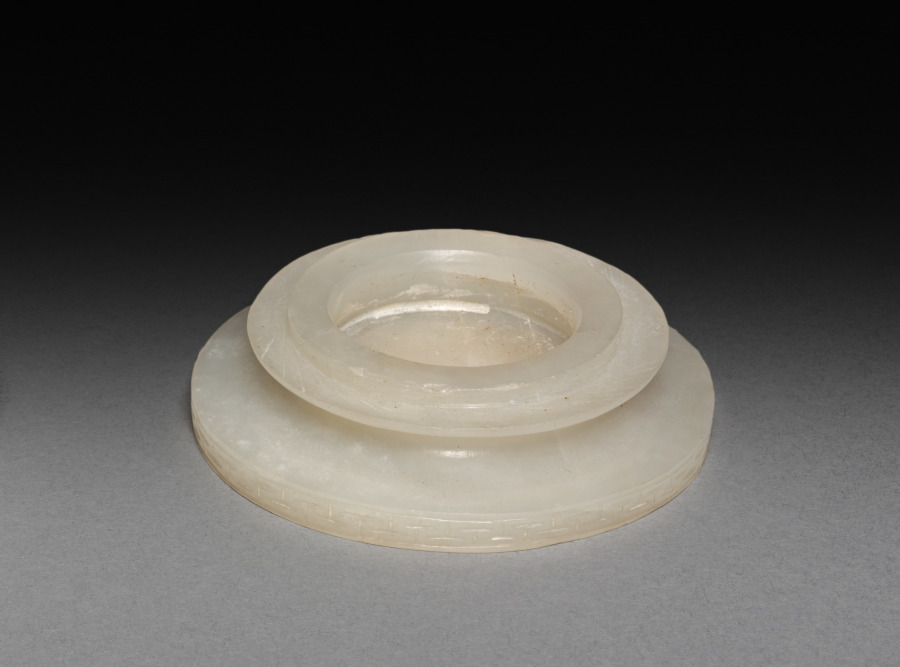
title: Three-Sectional Altar Group: Small Bowl with Carved Dragon (upper section of base)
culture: China, Qing dynasty (1644-1911)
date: Qing Dynasty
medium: jade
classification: Jade